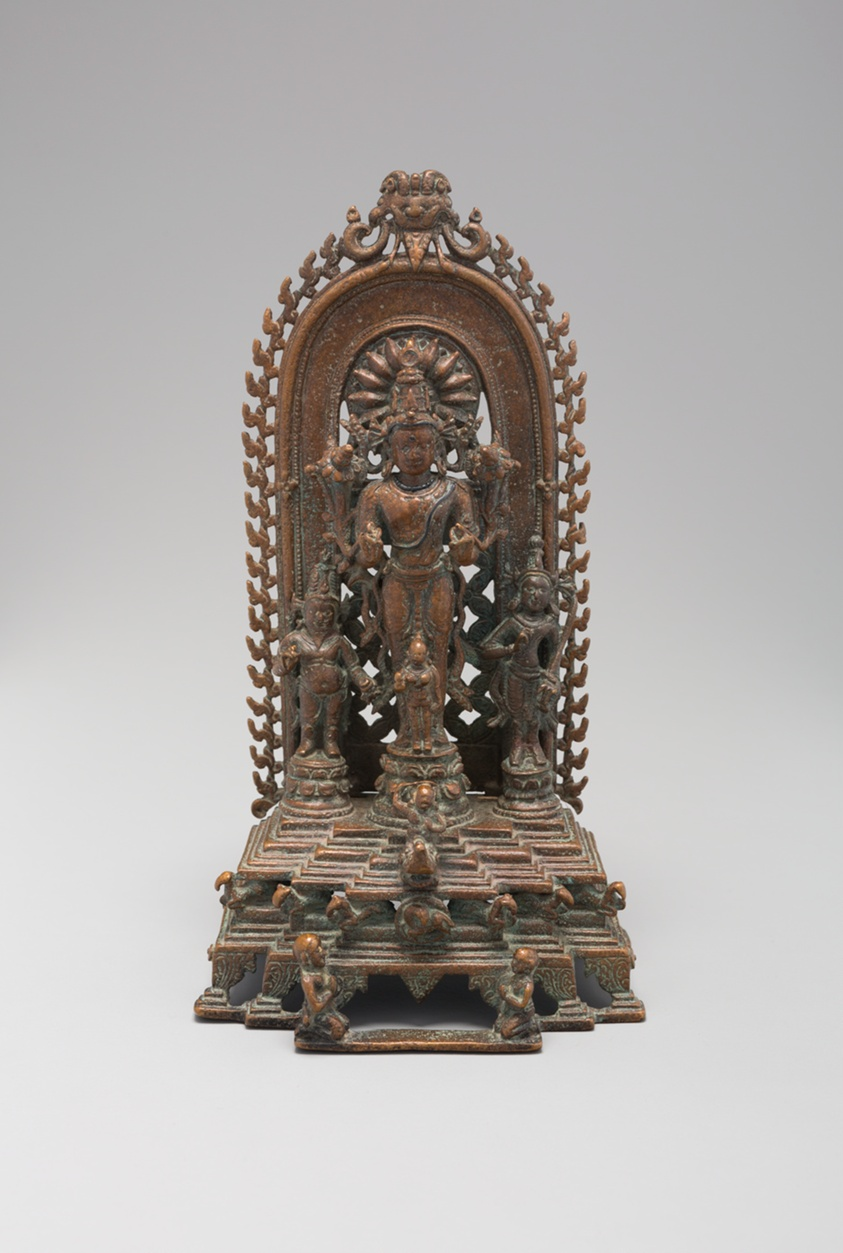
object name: Sculpture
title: Sun God Surya on His Chariot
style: South Asian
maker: Bangladesh or Eastern India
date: Pala period, 10th/12th century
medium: Bronze inlaid with silver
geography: Bangladesh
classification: bronze; metal; sculpture; asian art